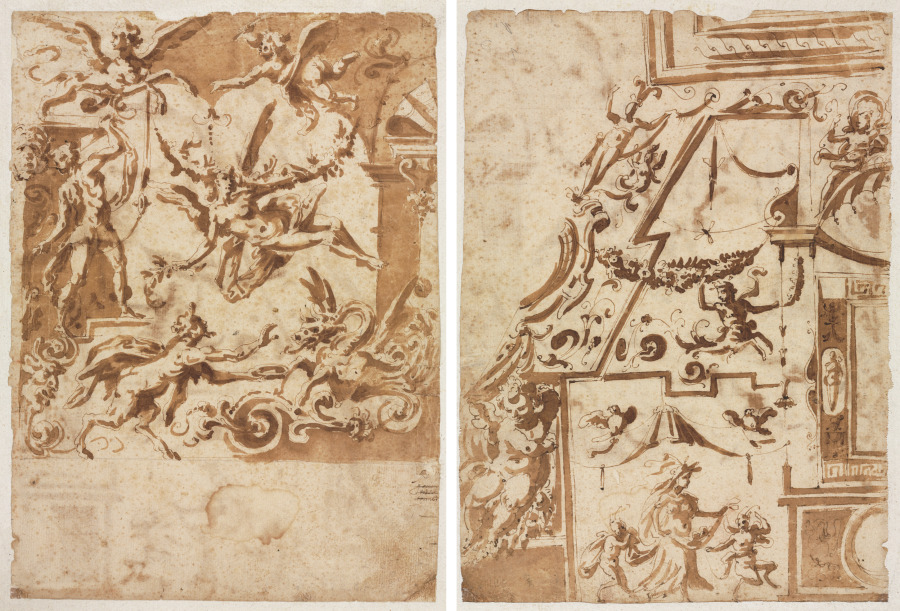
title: Grotesque with a Satyr Feeding a Dragon (recto); Grotesque with a Leaping Centaur (verso)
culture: Italy, 16th century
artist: Marco Marchetti (Italian, 1565–1588)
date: c. 1565/1588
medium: pen and brown ink and brush and brown wash, over traces of black chalk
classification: Drawing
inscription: lower right, by unknown hand, in brown ink: g[illegible] / [gauani ?][crossed out] / Fisza [crossed out] / tromb. [crossed out]